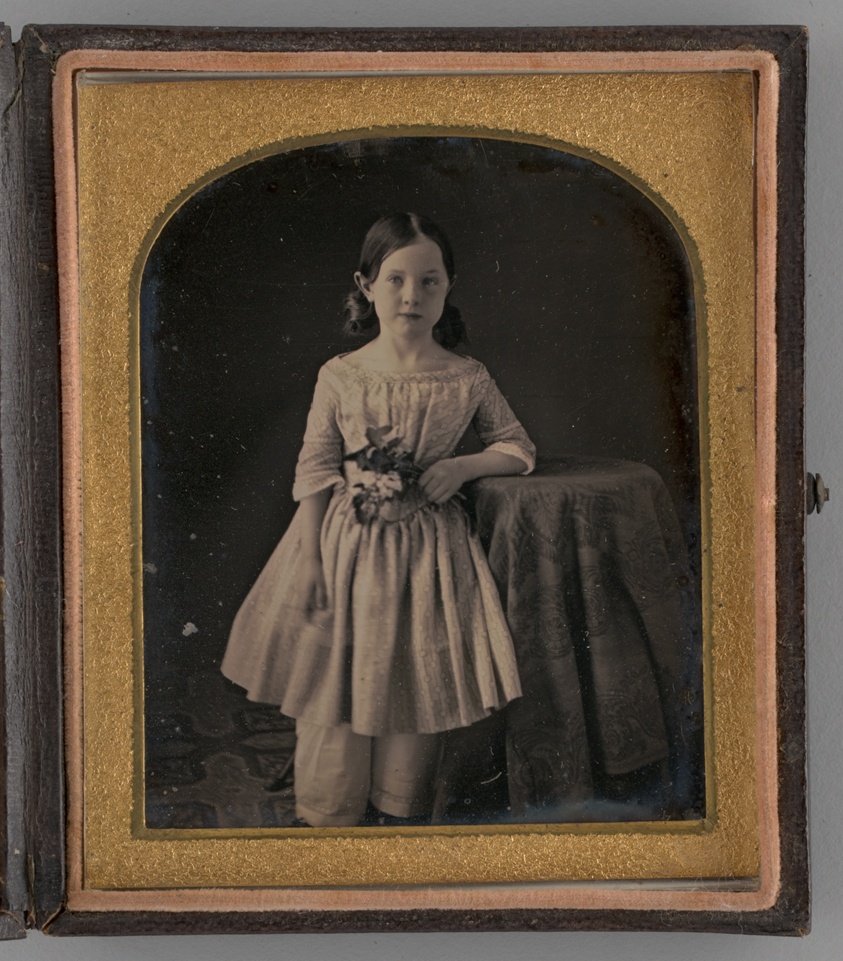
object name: Photograph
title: Untitled (Portrait of a Girl Holding Flowers)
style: 19th century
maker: Unknown maker; American, 19th century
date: 1847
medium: Daguerreotype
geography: United States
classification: portrait; photograph; photographic process; photography; portrait; daguerreotype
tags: lundberg collection, portrait, girls, portraits, portraits: child subject, portraits: female subject